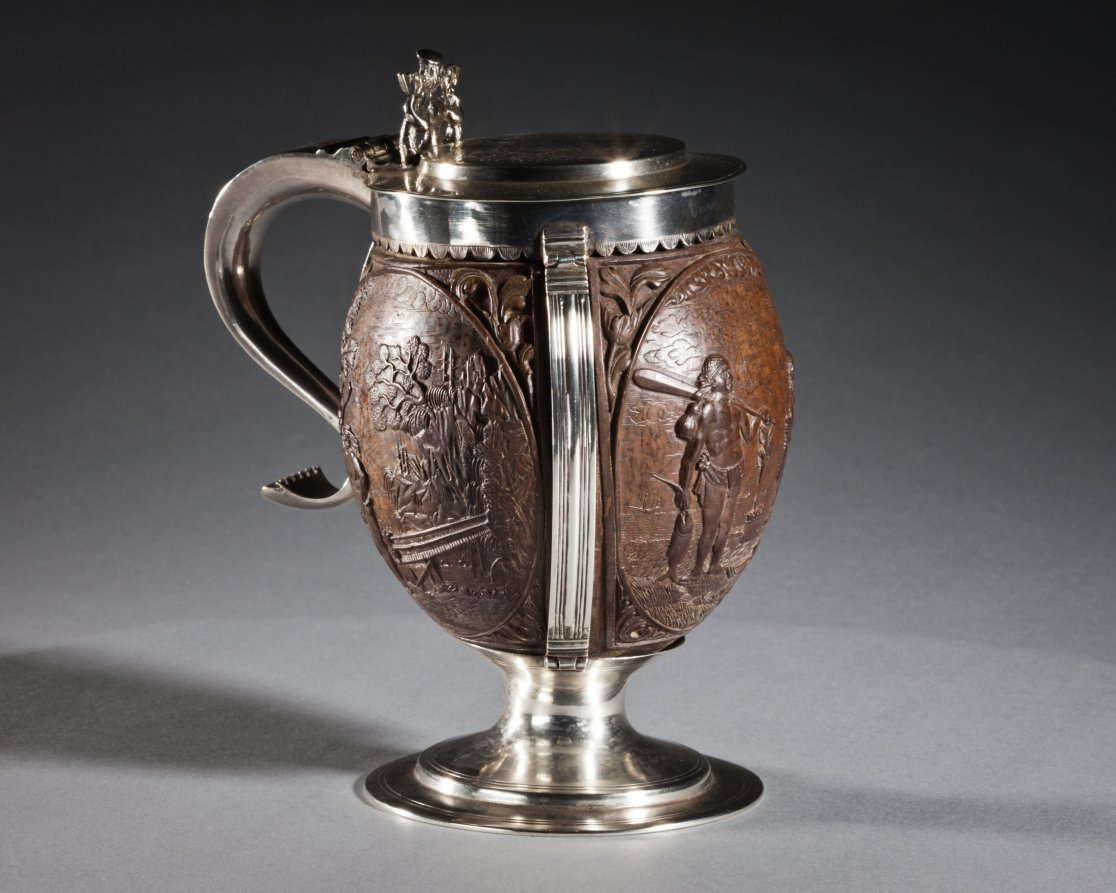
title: Coconut Cup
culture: carved coconut, probably The Netherlands; silver mount, probably England, 17th century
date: c. 1630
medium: carved coconut in silver mount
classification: Metalwork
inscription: top lid has engraved coat-of-arms, underside of lid has inscription: George Lewis TIVERTON Feby, 1st 1760.